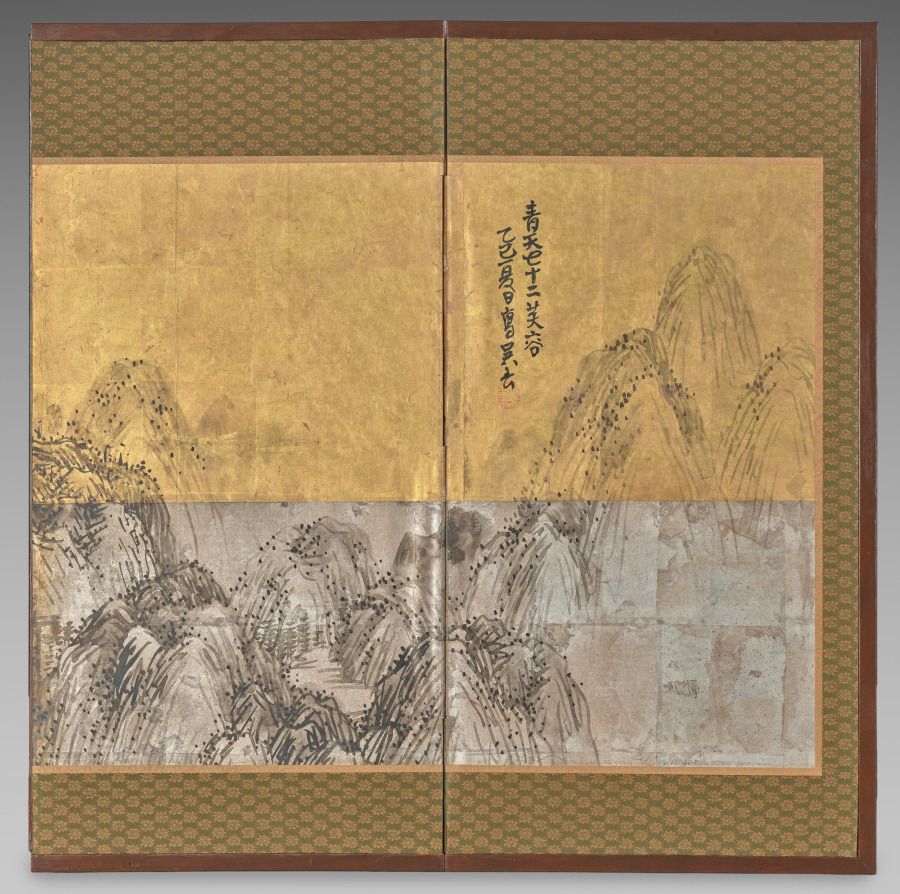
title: Seventy-Two Peaks Under the Blue Sky with Mount Furong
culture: Japan, Edo period (1615–1868)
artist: Matsumura Goshun (Japanese, 1752–1811)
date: 1785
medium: Eight-panel folding screen; ink with gold and silver foil on paper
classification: Painting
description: The low height of this folding screen suggests its use as a partition in a small tearoom. An inscription identifies the scene as the 72-peak Heng mountain range in Hunan, China, associated with Buddhist and Daoist traditions and celebrated in poetry. Special mention in the inscription is made of Mount Furong, one of the peaks in the range. Matsumura Goshun may have drawn inspiration from his teacher, Yosa Buson (与謝蕪村) (1716–1783), whose final work depicted the same mountain range.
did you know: By painting on silver and gold foil, Matsumura Goshun created an alluring surface and deep space in this surprisingly spare vista.